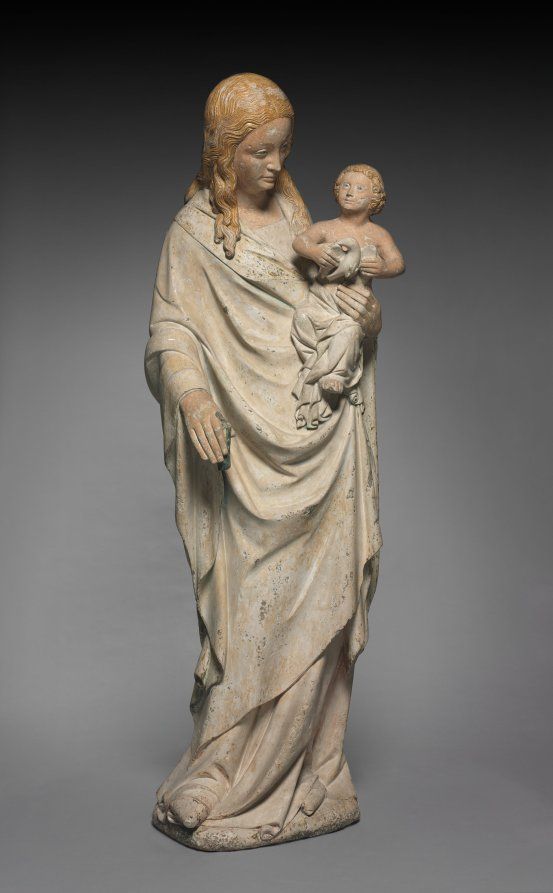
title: Virgin and Child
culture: France, Loire Valley, 14th century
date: c. 1385–90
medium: limestone with traces of polychromy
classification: Sculpture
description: The vibrant naturalism of the Virgin’s face and long flowing hair, as well as the deep, rich folds of drapery are characteristic of the work of itinerant artists from the Netherlands who found employment at the Valois courts of France at Paris, Berry, and Burgundy. Their native styles and attention to realistic detail fused with native French artistic traditions toward the end of the 14th century and took root. The original source of this Virgin and Child is unknown, but its style suggests a relationship with similar sculptures made for churches and abbeys of the Central Loire Valley. The additional influence of the style of the sculptor André Beauneveu has also been noted for this sculpture. His commissions were abundant and his influence widespread. The sculptor of this work appears to have had some knowledge of Beauneveu’s work in the Loire region.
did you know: This sculpture was painted over many times over its history, common for medieval sculpture.